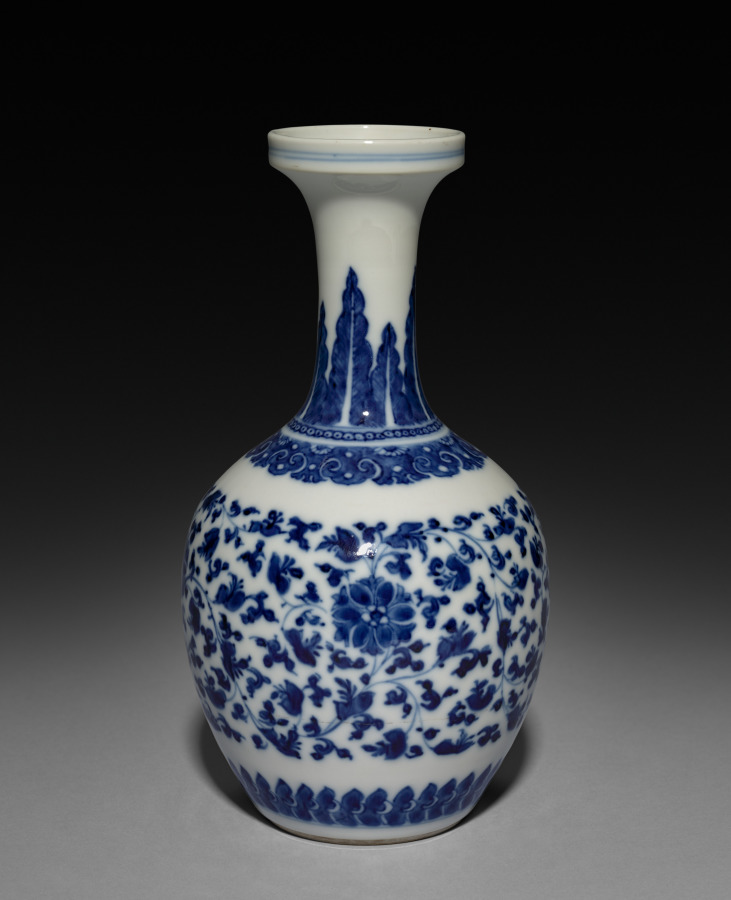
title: Globular Vase with Long Neck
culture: China, Qing dynasty (1644-1911), Kangxi reign (1661-1722)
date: 1661–1722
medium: porcelain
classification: Ceramic